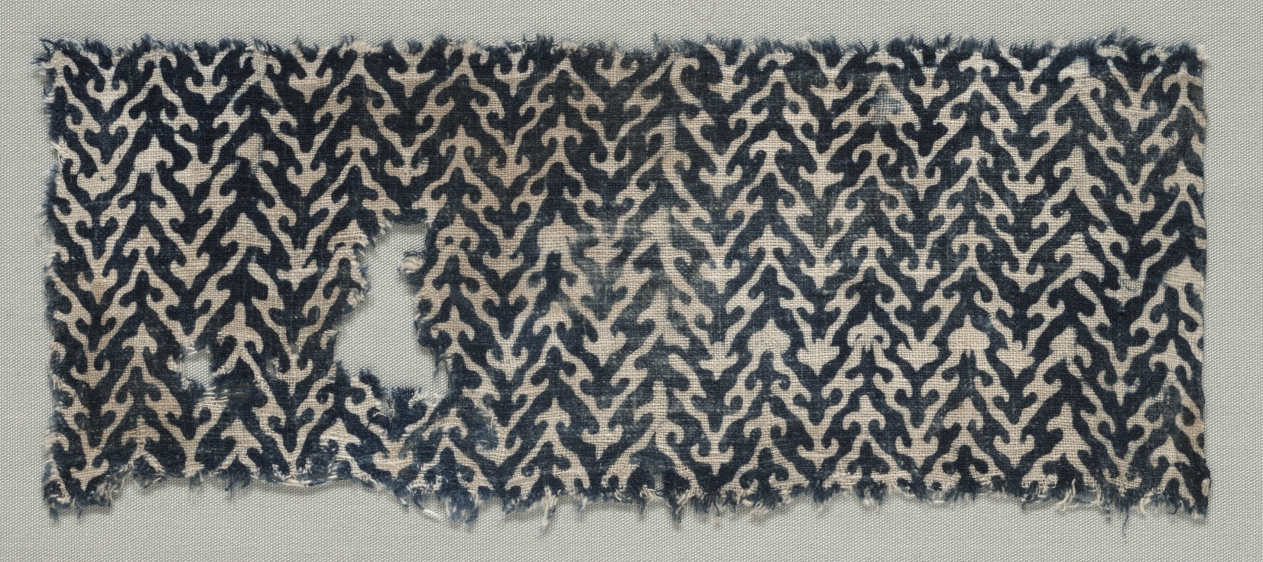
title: Fragment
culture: India, 12th-14th century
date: 1100s - 1300s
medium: plain cloth, resist dyed; cotton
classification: Textile